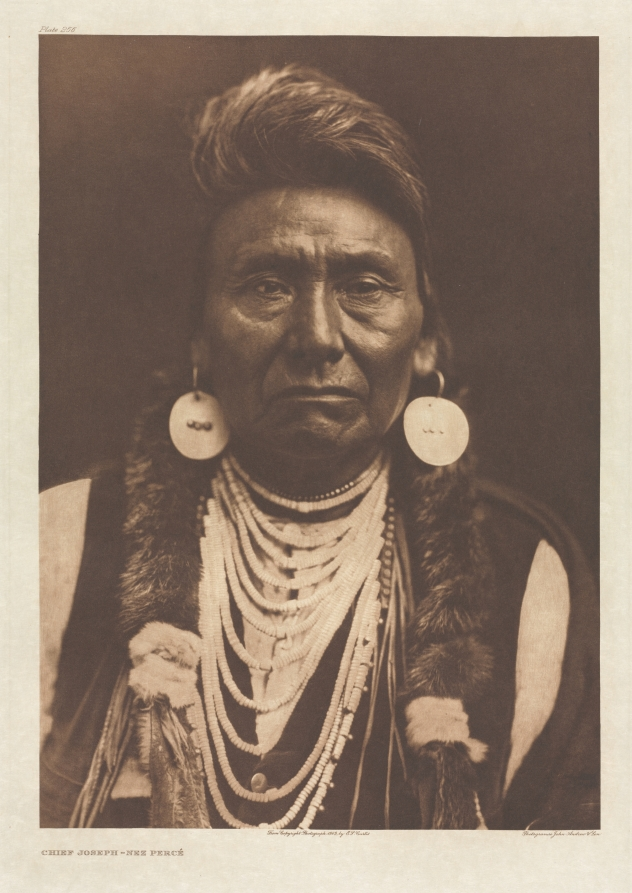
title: Portfolio VIII, Plate 256: Chief Joseph - Nez Percé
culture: America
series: The North American Indian: being a series of Portfolios picturing and describing the Indians of the United States, the Dominion of Canada, and Alaska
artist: Edward S. Curtis (American, 1868–1952)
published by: The University Press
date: 1903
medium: photogravure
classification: Portfolio